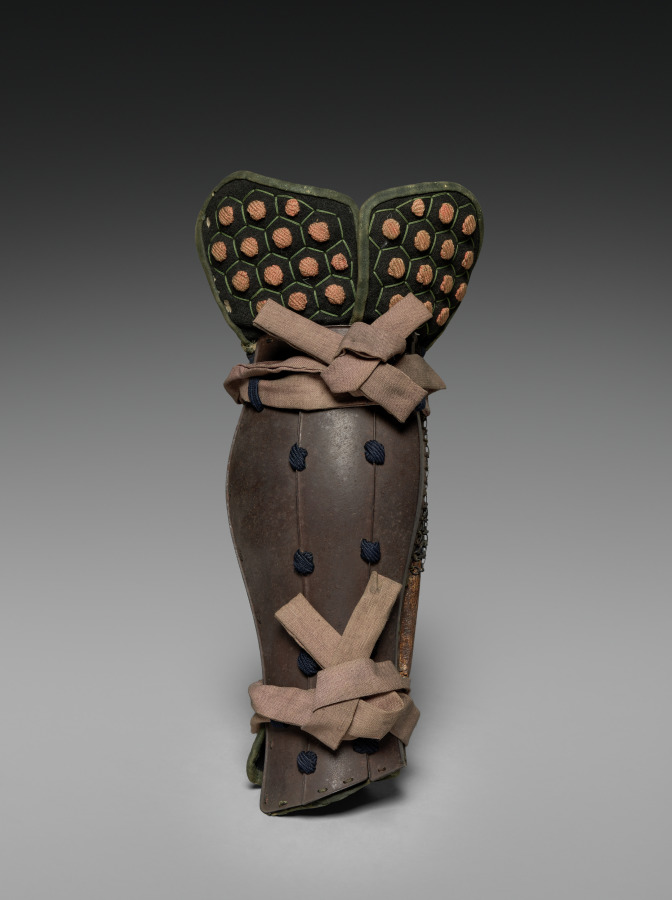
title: Shin Guard (Sune-ate)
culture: Japan, Edo period (1615–1868)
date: 1600s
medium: Iron, lacquer, textile (silk)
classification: Arms and Armor